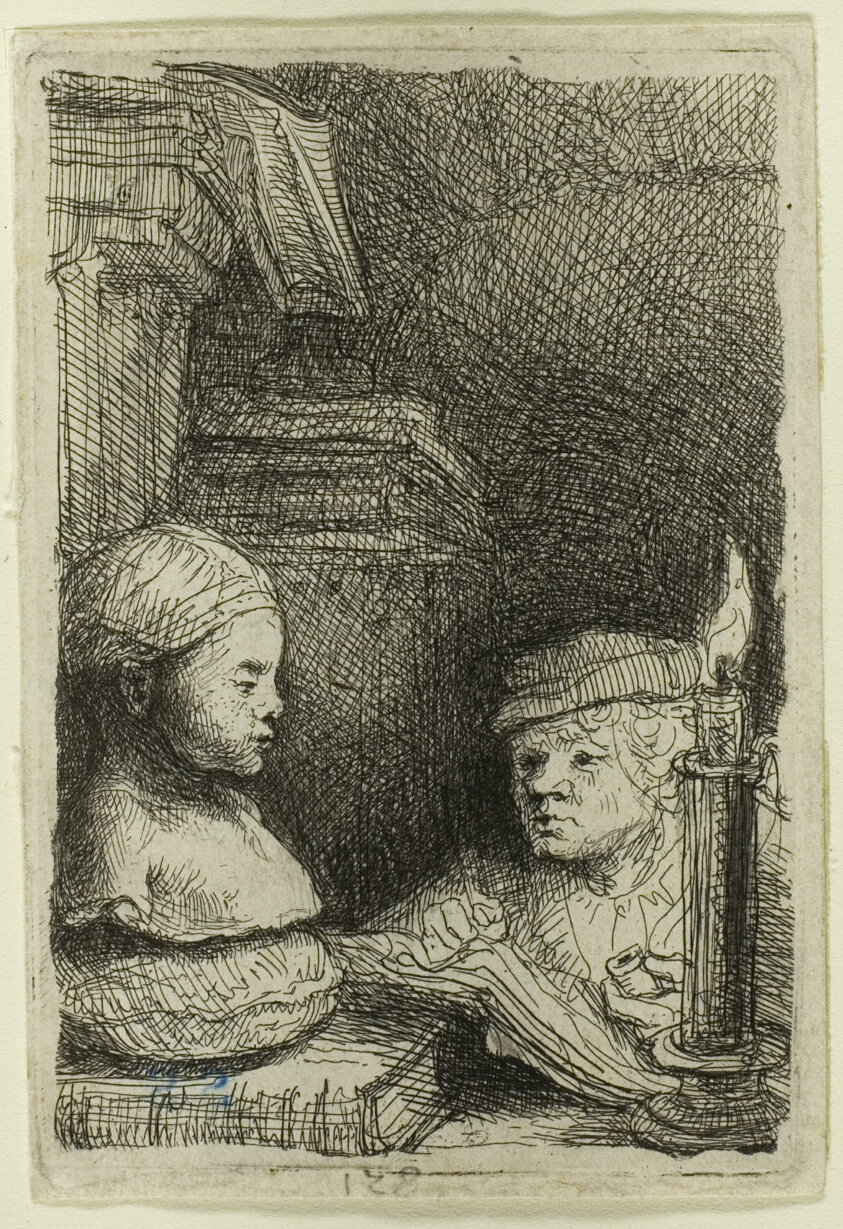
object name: Print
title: Man Drawing from a Cast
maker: Rembrandt van Rijn (Dutch, 1606-1669)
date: c. 1641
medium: Etching on ivory laid paper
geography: Holland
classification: etching; print; prints and drawing; paper